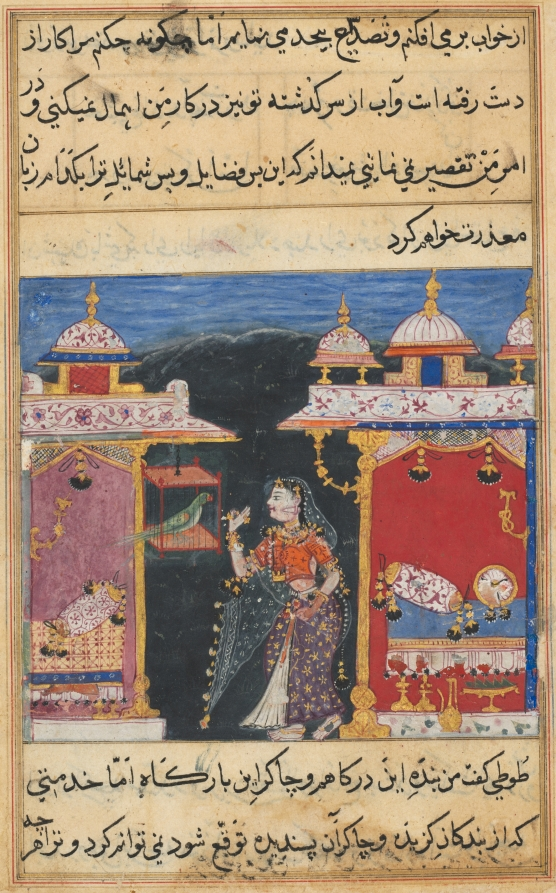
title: The Parrot Addresses Khujasta at the Beginning of the Seventh Night, from a Tuti-nama (Tales of a Parrot)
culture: Mughal India, court of Akbar (reigned 1556–1605)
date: c. 1560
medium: gum tempera, ink, and gold on paper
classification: Painting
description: Every night for 52 nights the sly domesticated parrot encourages his master’s wife Khujasta to meet her lover under cover of darkness. Just before she leaves, the parrot mentions a topic from a tantalizing tale; she becomes so curious that she cannot go out before hearing the whole story. By the time the story ends, dawn breaks, and it is too late for her to go out unnoticed. The artist who painted this page was still firmly entrenched in the idioms of pre-Mughal painting.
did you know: This miniature displays an intermingling of various pre-Akbar idioms in the Mughal atelier.